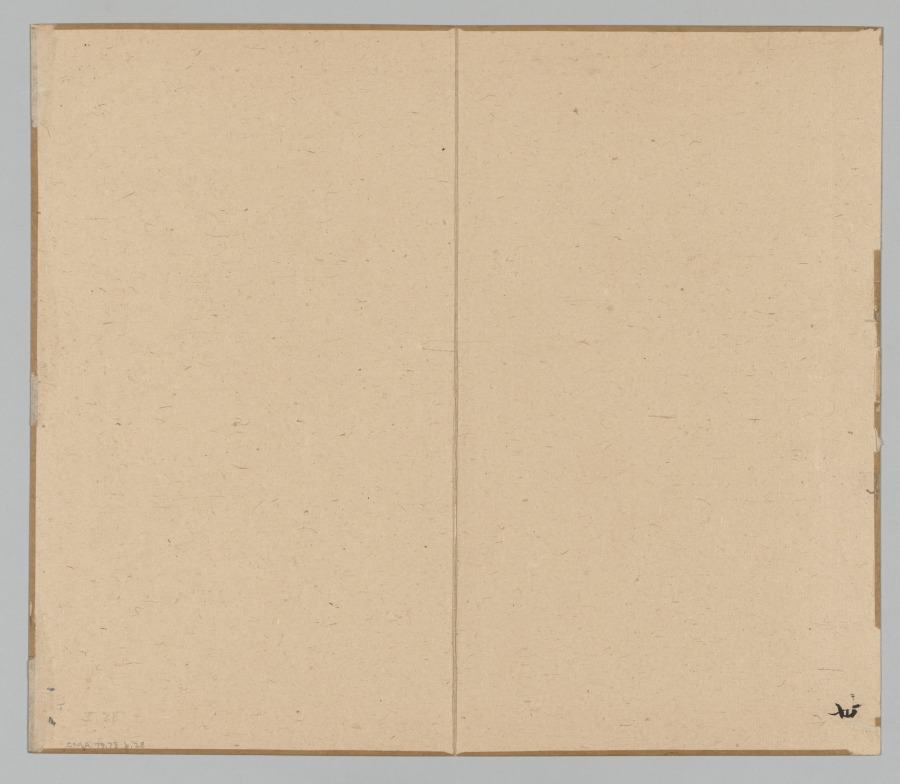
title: Reverberations of Taiga, Volume 2 (leaf 28)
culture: Japan, Edo period (1615–1868)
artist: Aoki Shukuya (Japanese, d. 1802)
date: mid- to late 1700s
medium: double-leaf from a pair of albums; ink and light color on paper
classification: Portfolio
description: Traditionally, young painters in Japan began their studies with an established master-painter. The master's compositions invariably became models that the apprentice copied to learn various ink and brush techniques. Shukuya was a pupil of the famous Kyoto artist Ikeno Taiga, whose style is reflected in these sketches of rocks, trees, and mountains.